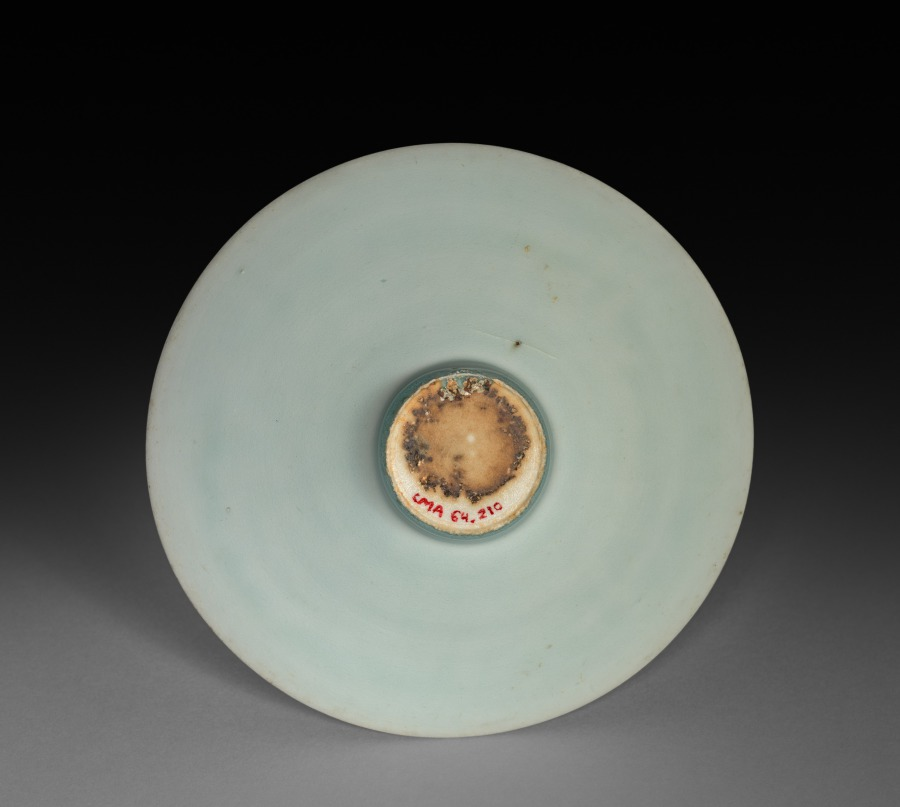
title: Conical Bowl with Floral Scroll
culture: China, Jiangxi Province, Jingdezhen kilns, Southern Song dynasty (1127–1279)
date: 1100s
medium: Glazed porcelain with incised decoration, qingbai ("blue-white") ware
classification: Ceramic